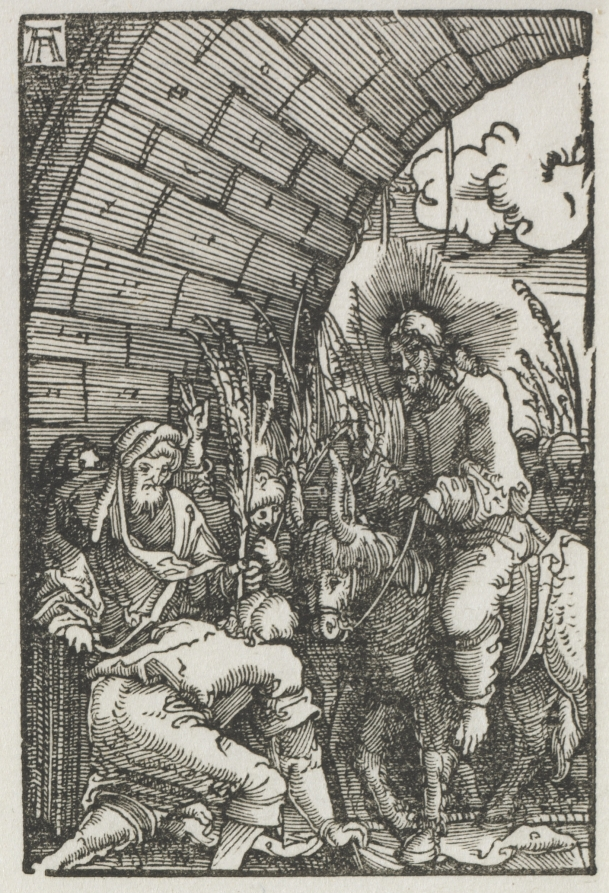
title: The Fall and Redemption of Man: The Entry into Jerusalem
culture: Germany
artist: Albrecht Altdorfer (German, c. 1480–1538)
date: c. 1515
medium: woodcut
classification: Print